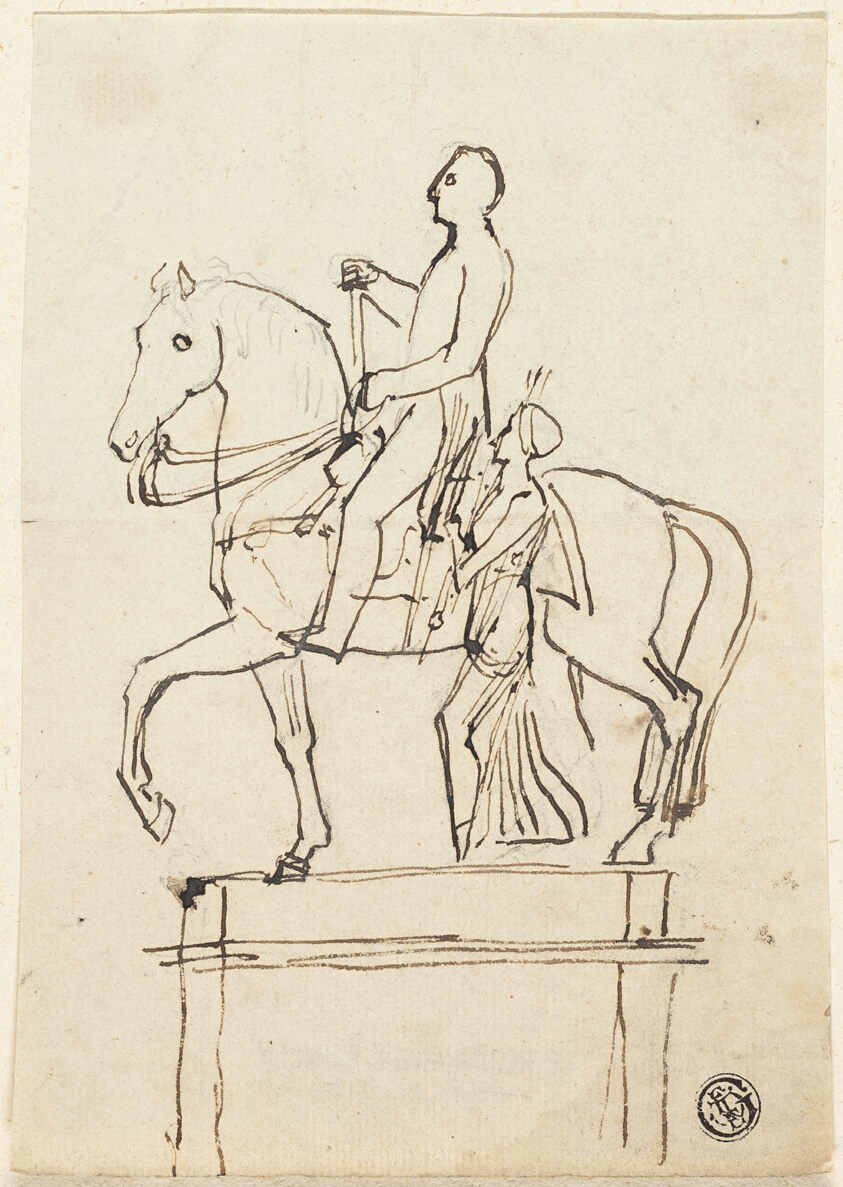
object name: Drawing and Watercolor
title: Sculpture of a Horseman Accompanied by Standing Woman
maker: Attributed to Thomas Stothard; English, 1755-1834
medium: Pen and brown ink over graphite, on gray laid paper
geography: England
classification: pen and ink drawings; drawings (visual works); prints and drawing